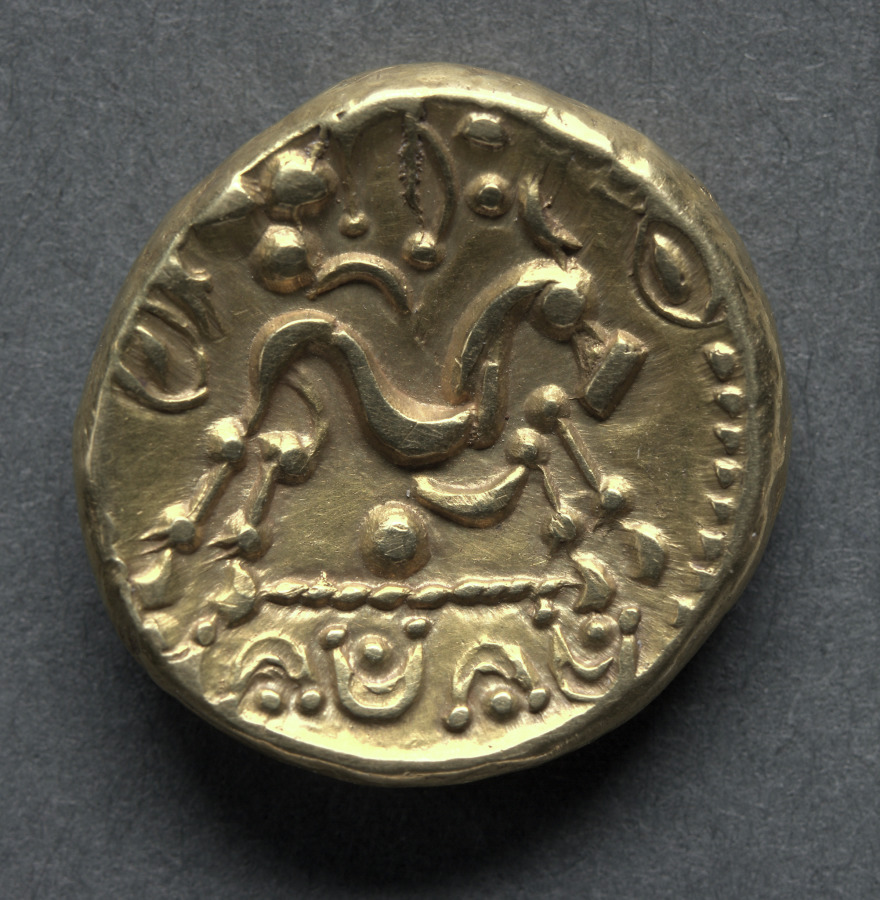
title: Stater: Horse (reverse)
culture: England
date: c. 57–45 BCE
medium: gold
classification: Coins